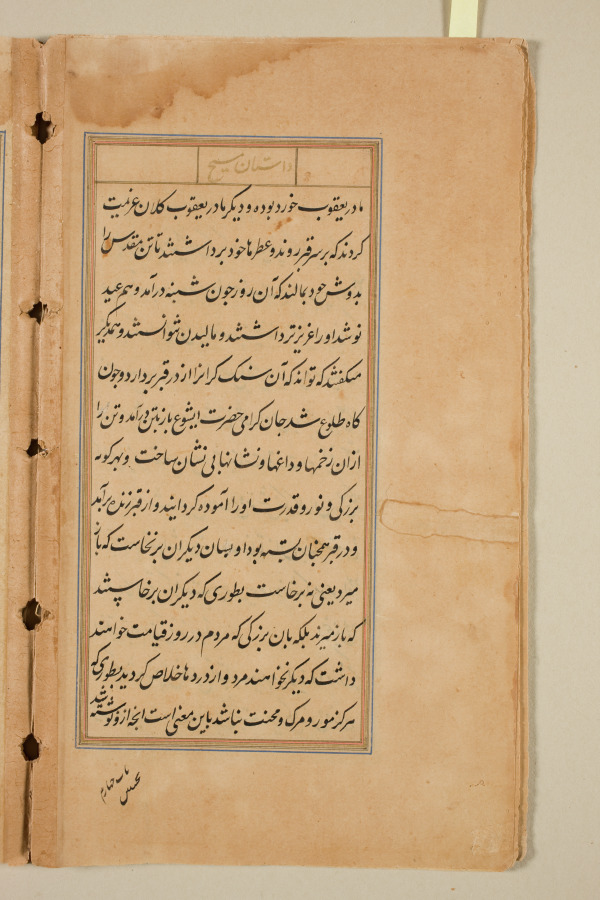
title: Text page from a Mirror of Holiness (Mir’at al-quds) of Father Jerome Xavier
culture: Mughal India, Allahabad, made for Prince Salim (1569–1627)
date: 1602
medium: Ink and gold on paper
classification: Manuscript